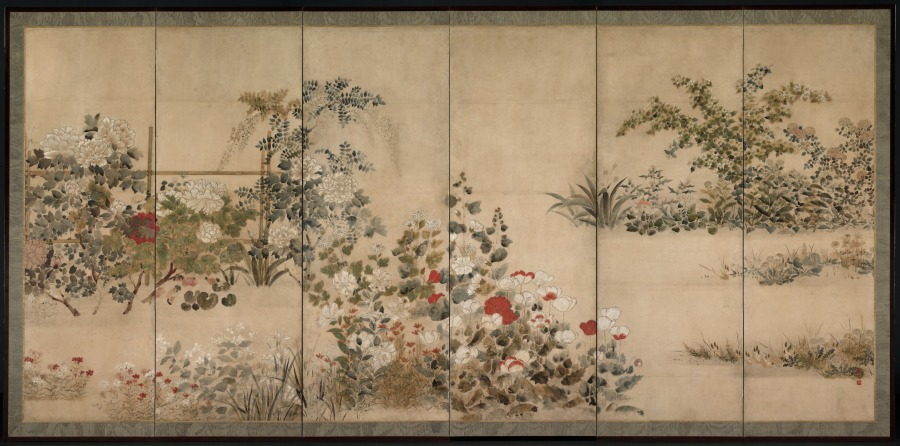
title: Flowers and Grasses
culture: Japan, Edo period (1615–1868)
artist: Kitagawa Sōsetsu (Japanese, active 1639–50)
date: mid-1600s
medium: Pair of six-panel folding screens; ink and color on paper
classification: Painting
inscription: two seals, lower left: "I-nen; Sosetsu"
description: Kitagawa Sōsetsu painted for the Maeda family, powerful rulers of what is present-day Ishikawa Prefecture on the central northern coast of Honshū, Japan’s main island. Screens served as room dividers and backdrops in Maeda grand residences. This composition is considered one of the artist’s masterpieces. Kitagawa Sōsetsu is thought to have been a student of Tawaraya Sōsetsu, who was in turn the student of Tawaraya Sōtatsu the Kyoto-based master painter regarded as the creator of the style that came to be known as Rinpa. By selecting a painter of this lineage, the Maeda family consciously connected their aesthetics to those of the imperial capital as a means of proclaiming their elevated status.